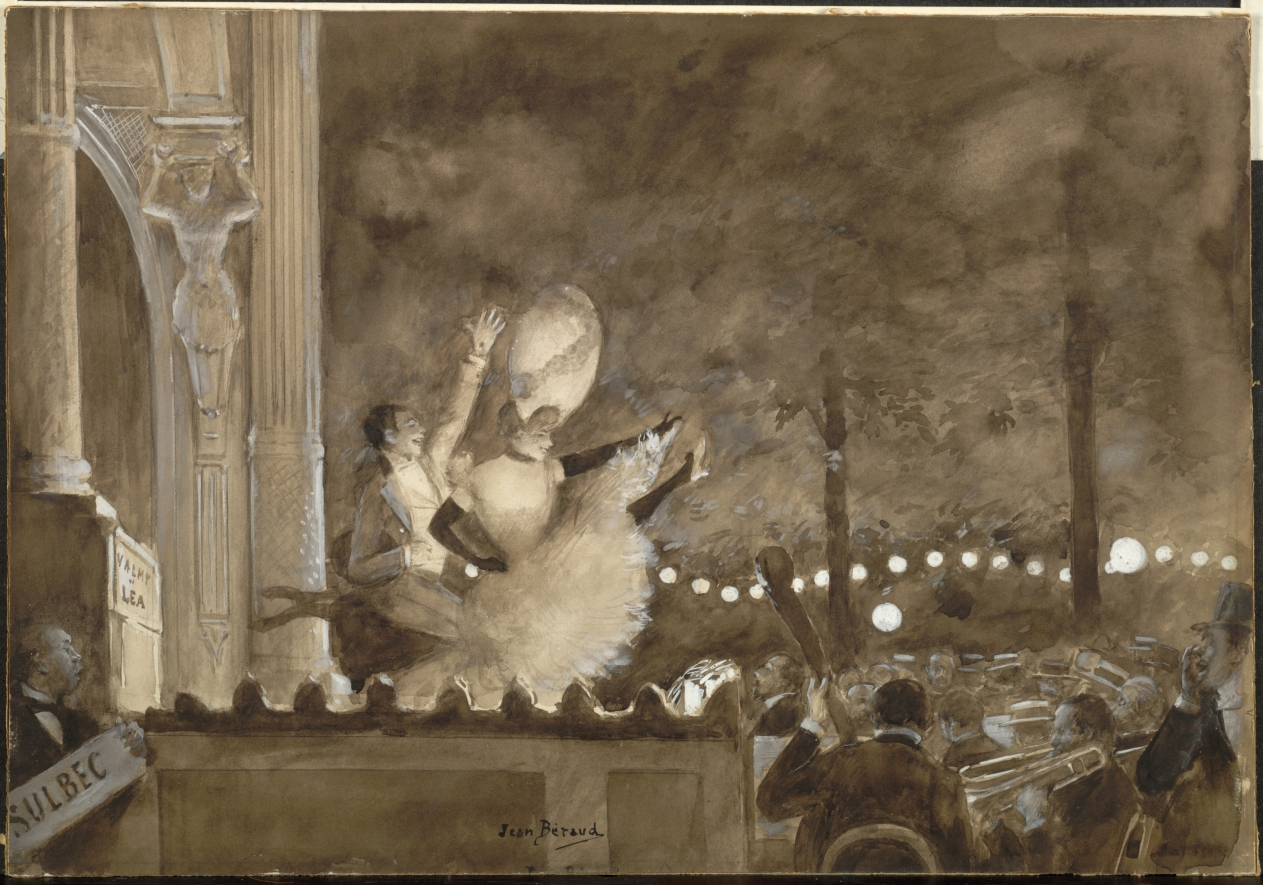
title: Valmy and Léa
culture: France, 20th century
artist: Jean Béraud (French, 1849–1935)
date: c. 1885–95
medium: brush and brown wash, heightened with white gouache, over graphite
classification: Drawing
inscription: lower center, in black ink: Jean Béraud / [fragments of an additional signature]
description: A forerunner to the cabaret, the café-concert was an irresistible subject for artists working in fin-de-siècle Paris. Here, the performers are illuminated by the unnatural glow of gas footlights, while the musicians in the orchestra, seen mostly from behind, are tucked in the shadowy foreground. The neck of the double bass extends above the crowd, drawing the viewer’s eye to the climactic cancan.